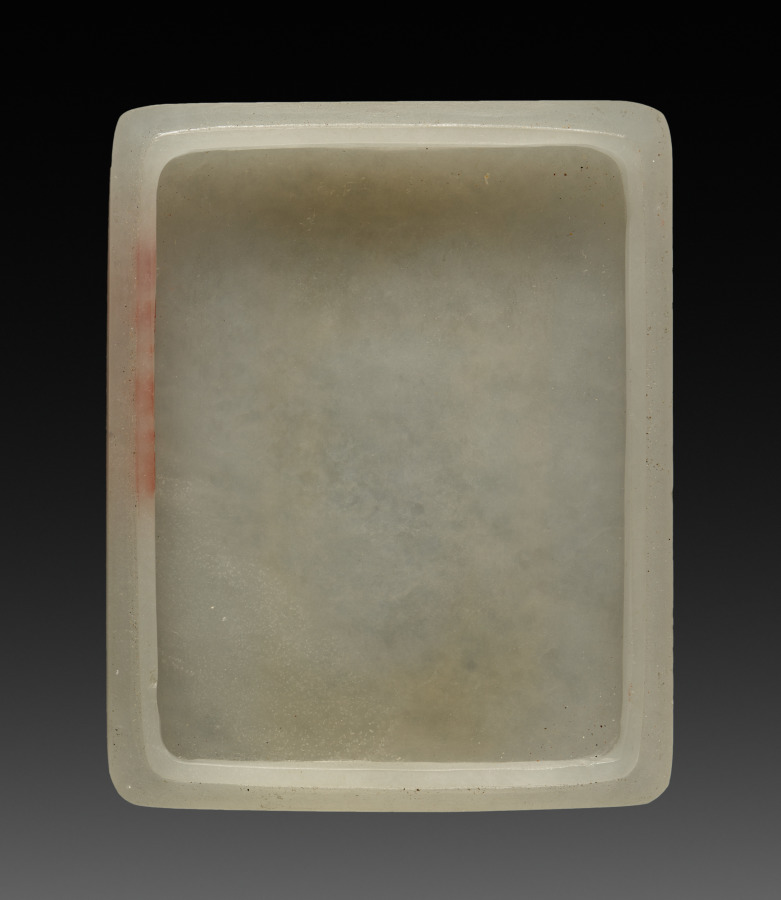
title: Seal Box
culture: China, Qing dynasty (1644-1911)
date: 1644–1700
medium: jade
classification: Jade